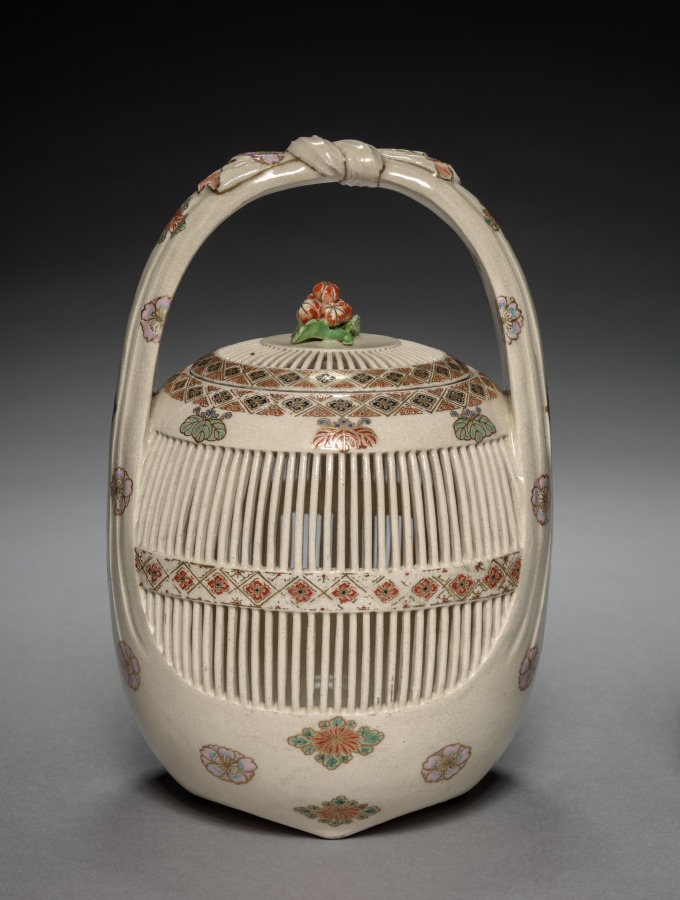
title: Jar: Satsuma Ware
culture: Japan, Edo period (1615–1868)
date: early to mid-1800s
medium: pottery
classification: Ceramic